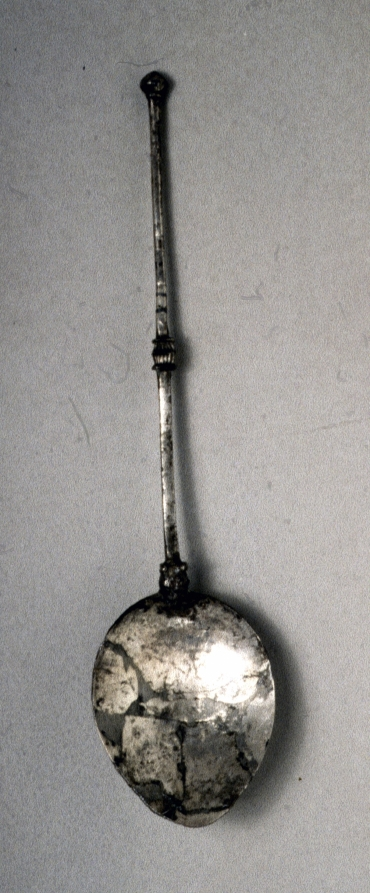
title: Spoon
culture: Byzantium, Syria(?), Byzantine period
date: 300s CE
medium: silver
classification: Metalwork